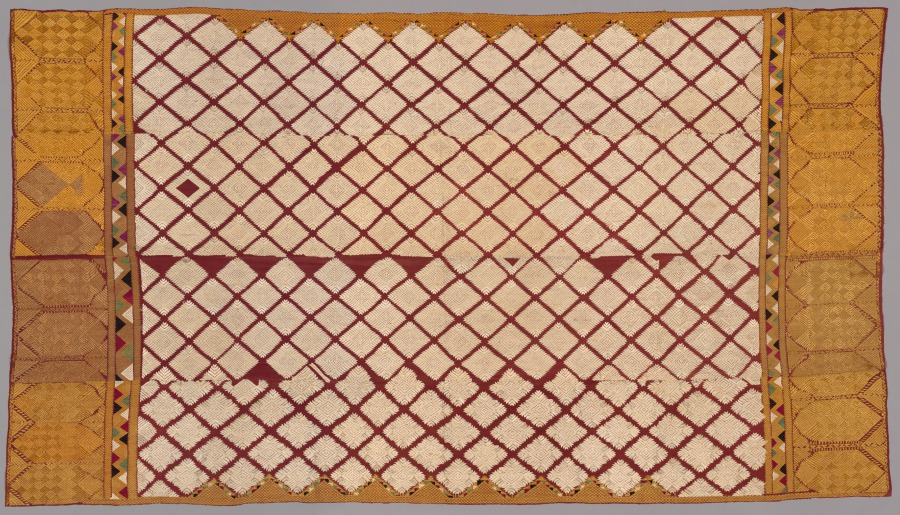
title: Head Shawl ("Phulkari")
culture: India, Punjab, 19th century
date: 1800s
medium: embroidery: silk on cotton tabby ground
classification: Embroidery